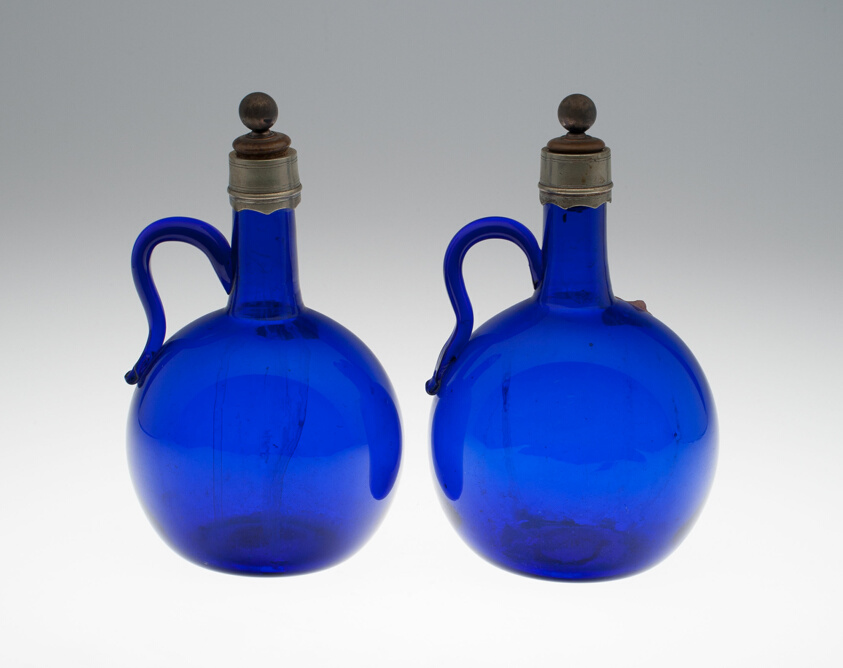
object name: Glass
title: Pair of Bottles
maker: United States or Bohemia, Czech Republic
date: 19th century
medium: Glass with metal mounts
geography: United States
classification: glass; european decorative arts